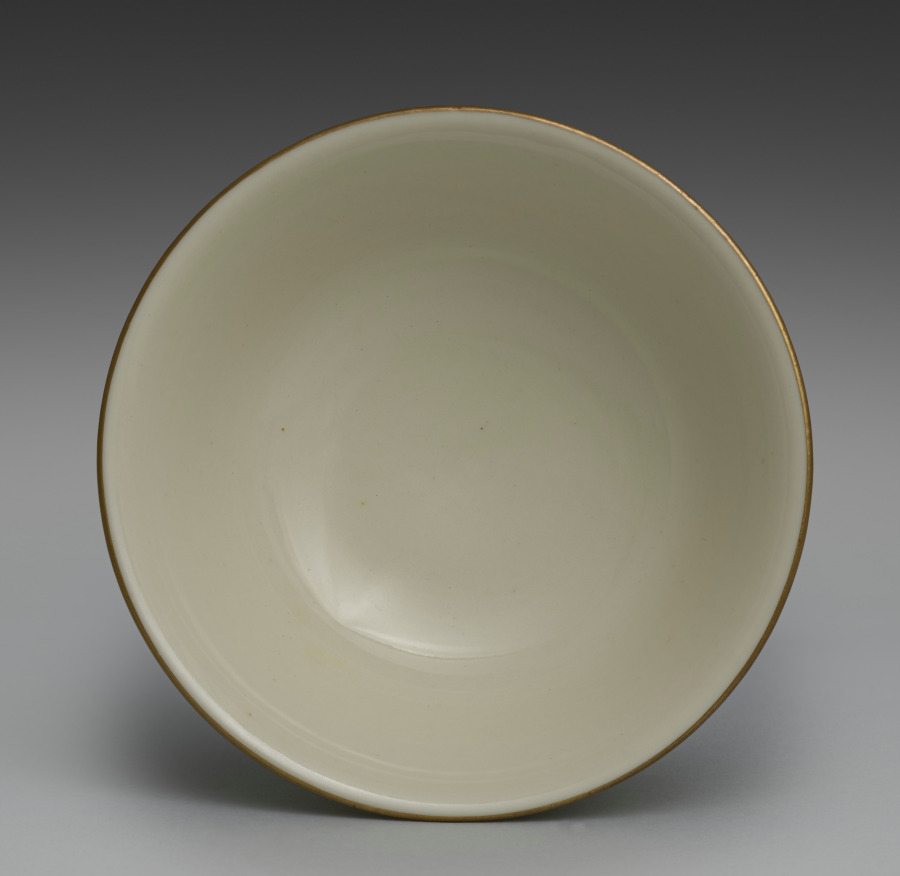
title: Bowl from Dining Set with Plum Blossoms and Cracked-Ice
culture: Japan, Meiji period (1868–1912)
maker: Seifū Yohei II (Japanese, 1844–1878)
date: c. 1875–78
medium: Porcelain with molded designs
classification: Ceramic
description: Each item in this set has a delicate low-relief design of flowering plum branches over scattered, intersecting lines meant to resemble the cracked-ice surface of a frozen body of water and is signed on the base in gold pigment. While Yohei II produced many fine works in underglaze blue, like those produced by Kiyomizu Shichibei, he also made works in quite different styles later in his career, from the early 1870 s. In 1873, he was appointed purveyor to the Industrial Center of Kyoto Prefecture, a designation associated with Kyoto’s efforts to reach an international market through the port of Kobe; and from 1875 until his death, he was involved in national-level projects to present Japanese ceramics across the world. It was during this period that Yohei III was apprenticed to Yohei II, and it has been suggested that this set may in fact be an early example of Yohei III’s work, which he signed with his teacher’s name. Decorated with flowers resembling Japanese textile motifs, the set calls to mind the design of Yohei II’s pair of vases with plum blossoms in the Victoria and Albert Museum. Here, the elaborate trees created for a formal public exhibition setting have been translated into the approachable blossoms of the genteel domestic environment. While the designs are consistent across the pieces, each raised flower petal and pistil and each incised line in the ice was done by hand, so the cups, bowls, and dishes are similar yet unique. The bottoms of two boxes once identified the set’s owner, but the information has been deliberately obscured with black ink. However, inscriptions still visible appear to indicate two occasions, once at the end of July 1886 , and once again in June 1916 , when parts of the set were requested from Hokura in Niigata Prefecture. The location corresponds to a neighborhood in the present-day city of Jōetsu. The surname Tsuji 辻 also appears on a paper tag affixed to one of the box cloths. Future research may possibly reveal more about their provenance. A vase by Yohei III in a private collection combines the formal grandeur of the Yohei II vases in the Victoria and Albert Museum with the gentler design of this dining set, placing flowering plum trees against soft, scalloped-edge clouds resembling those in golden screens.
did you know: The dining wares have a creamy white coloration that the four boxes containing them identify as Korean in style.